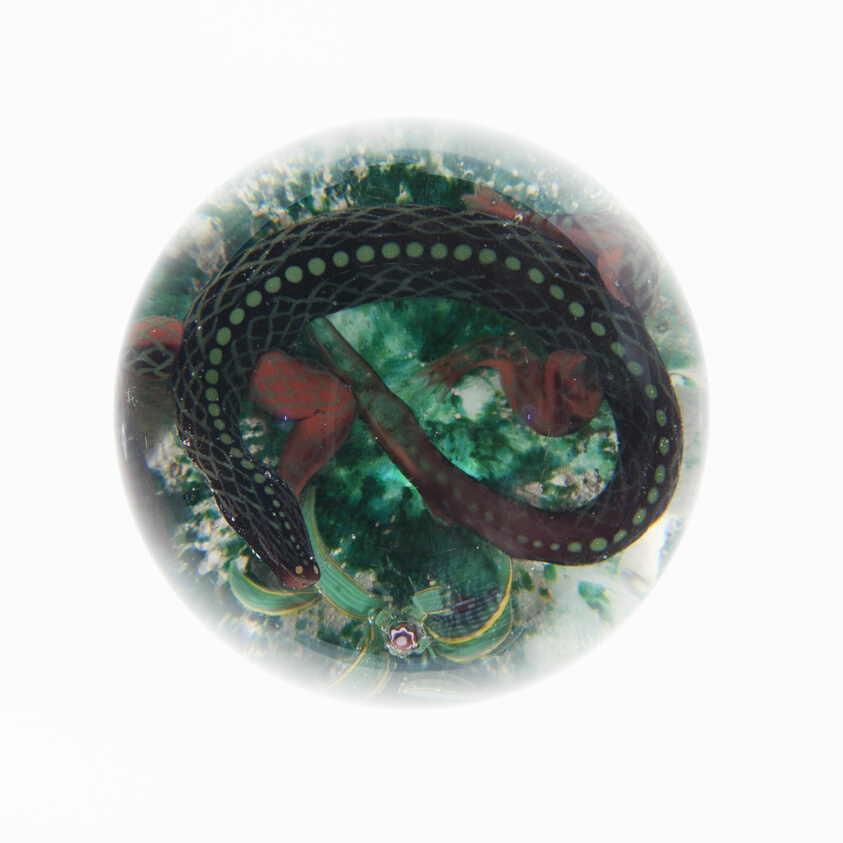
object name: Glass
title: Paperweight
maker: Attributed to Monot, Pere et Fils, et Stumpf; Cristallerie de Pantin (French, 1850-1890)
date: c. 1878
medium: Glass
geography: France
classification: paperweight; lampwork; european decorative arts; glass